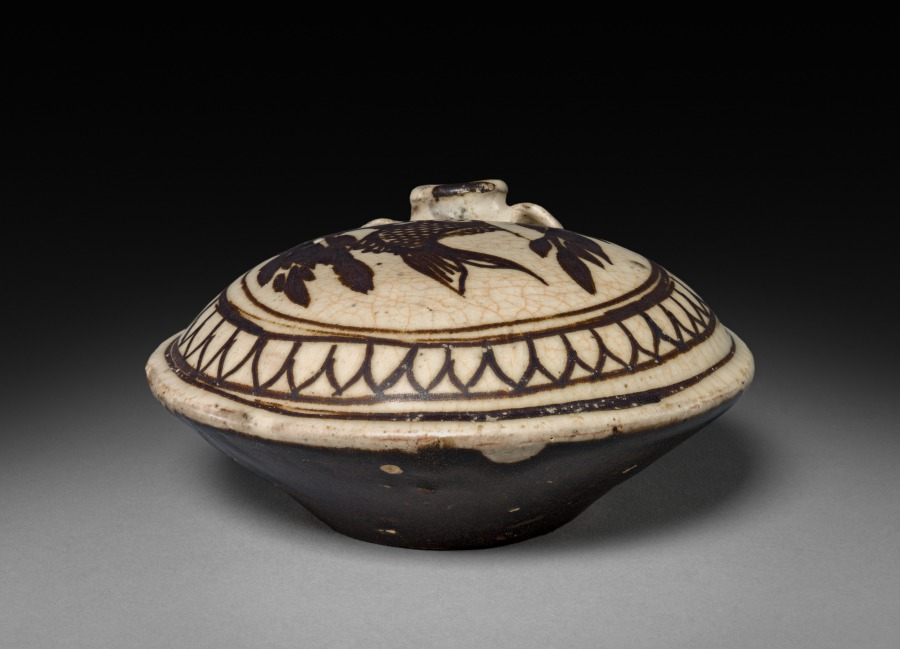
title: Water Dropper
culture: China, Yuan dynasty (1271-1368)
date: 1271–1368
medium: Stoneware, Cizhou ware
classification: Ceramic